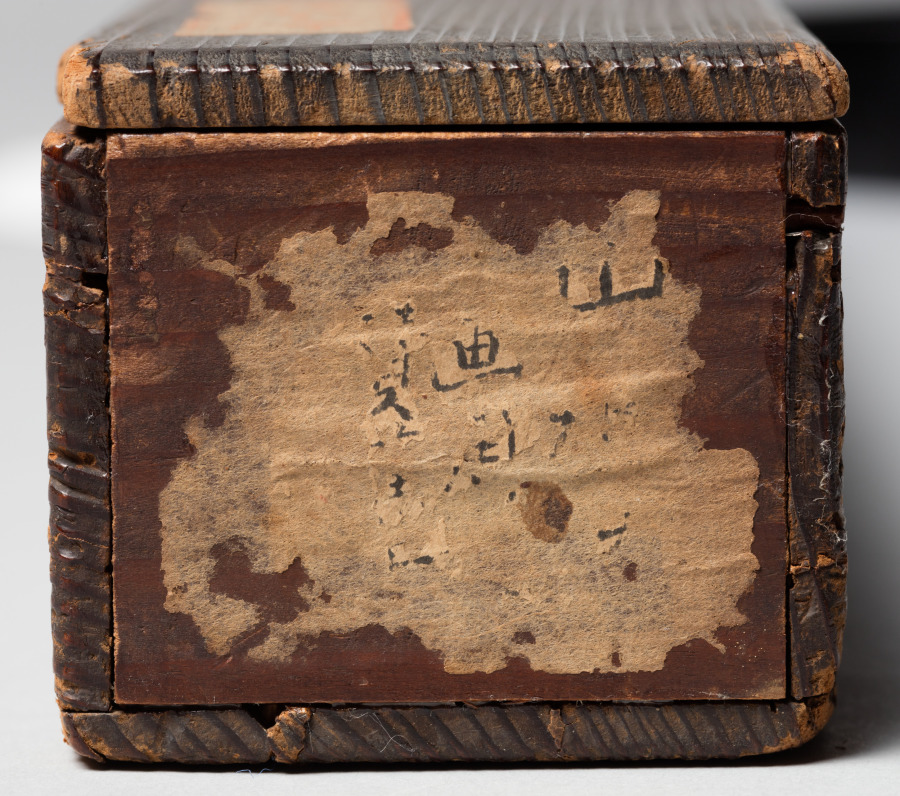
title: Landscape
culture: Japan, Muromachi period (1392–1573)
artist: attributed to Kenkō Shōkei (Japanese, active 1478–1506)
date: late 1400s–early 1500s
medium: hanging scroll, ink and light color on paper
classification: Painting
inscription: inscription above signed Shō'u Kojin; calligraphy by the Shokōji priest Tōgan Zuisen 桃源瑞仙 (1430–89)